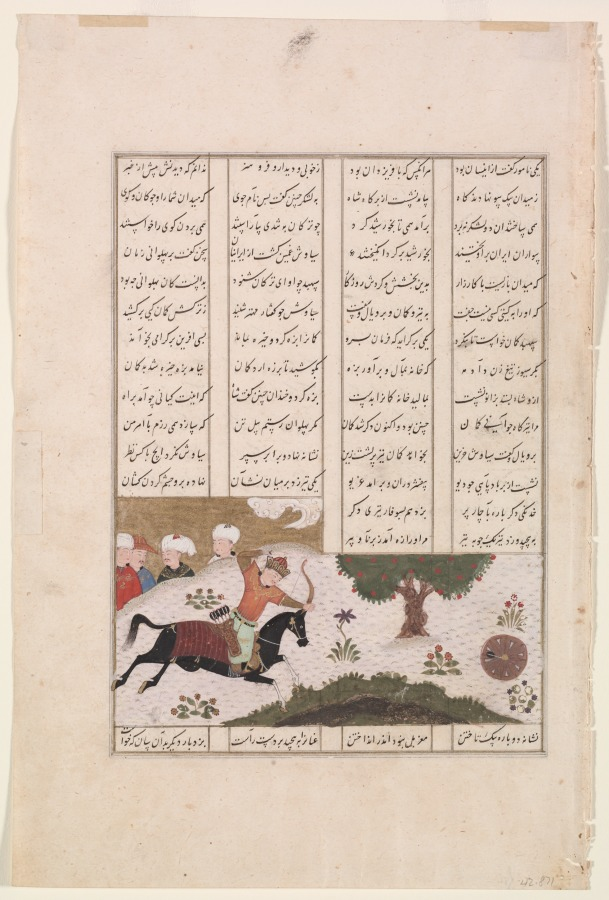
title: Siyavush on His Horse Hitting a Rolling Target (recto) and Persian verses (verso), from a Shahnama (Book of Kings) of Firdausi (940–1019 or 1025)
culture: Iran, Shiraz, Timurid period (1370-1501)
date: late 1400s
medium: Opaque watercolor, silver, gold, and ink on paper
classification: Manuscript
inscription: script: Nasta'liq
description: A prince from Iran’s early legendary history, Siyavush was sent by his father, the shah, to train under the great warrior Rustam in the arts of hunting, archery, and horseback riding. In this painting, Siyavush demonstrates his considerable skill by hitting the bulls eye on a rolling target from horseback. The gold sky, pastel ground with grassy tufts, and dense leafy riverbank are distinctive features of Persian painting during this period.